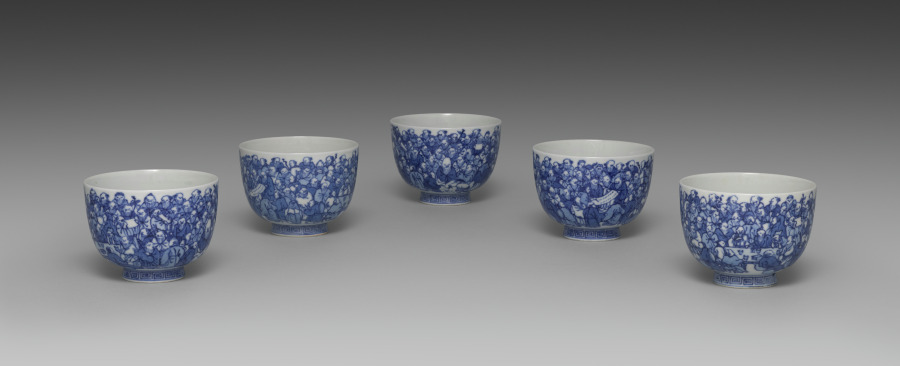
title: Teacups with a Hundred Sages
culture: Japan, Meiji period (1868–1912)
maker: Seifū Yohei III (Japanese, 1851–1914)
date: 1893–1914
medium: Set of five teacups; porcelain with underglaze blue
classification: Ceramic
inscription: 清風造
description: Each of these five teacups has a painting of identical design in underglaze blue, but as the tiny figures are drawn entirely by hand, each cup has its own personality. The theme of the sencha cups is an assembly of sages or immortals, literally “a hundred venerable [people]” (hyakurō). The myriad figures crowd the scene in groups. The god of longevity, with his tall forehead, sits with his cranes, having flown in from Mt. Penglai on the Isle of the Immortals. Seven long-bearded sages sit around a stone table, chatting and drinking; one is seated on an enormous gourd. Of course, there is a stack of books on the table, and elsewhere, scrolls are being written upon or read—in one case held very close by a sage who is wearing glasses. The design was enormously popular in ceramics made for those engaged in literati culture.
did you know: Seifū Yohei III (1851–1914) produced many works for tea gatherings where people drank Chinese-style leaf-tea (sencha).